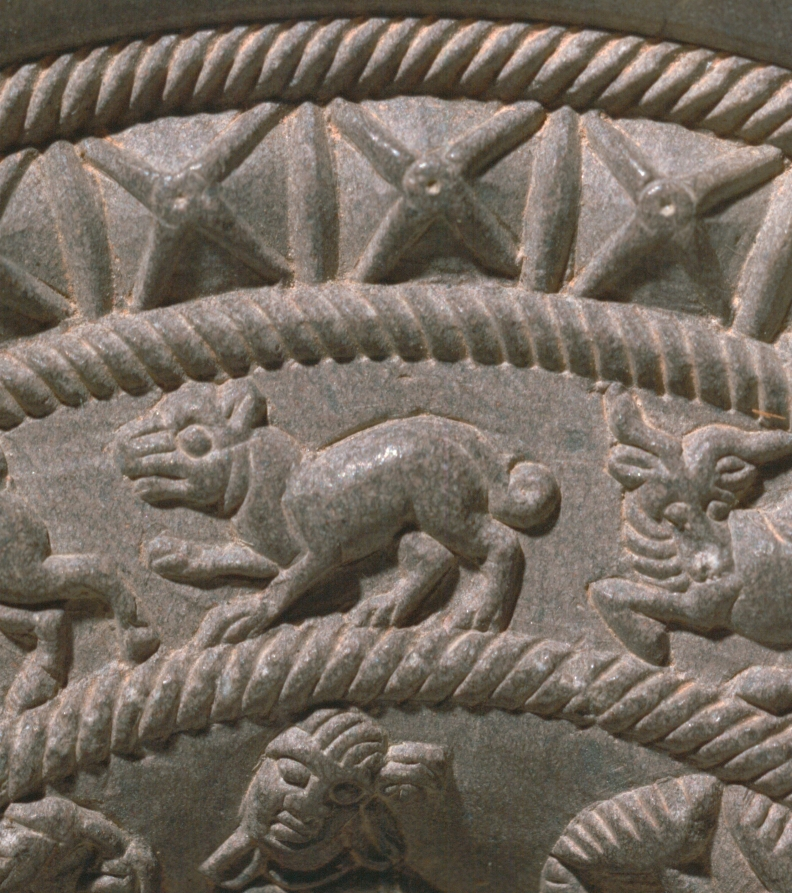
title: Ringstone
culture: India, Maurya period (322–185 BCE)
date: 200s BCE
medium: steatite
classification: Sculpture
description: Ringstones are among the earliest works of art to be created in stone during India's historical period. This example is finely carved with detailed images of affectionate couples and palm trees, running animals, and geometric motifs in concentric circles. The function of ringstones remains uncertain, since none of the surviving examples is inscribed or explained in a text.